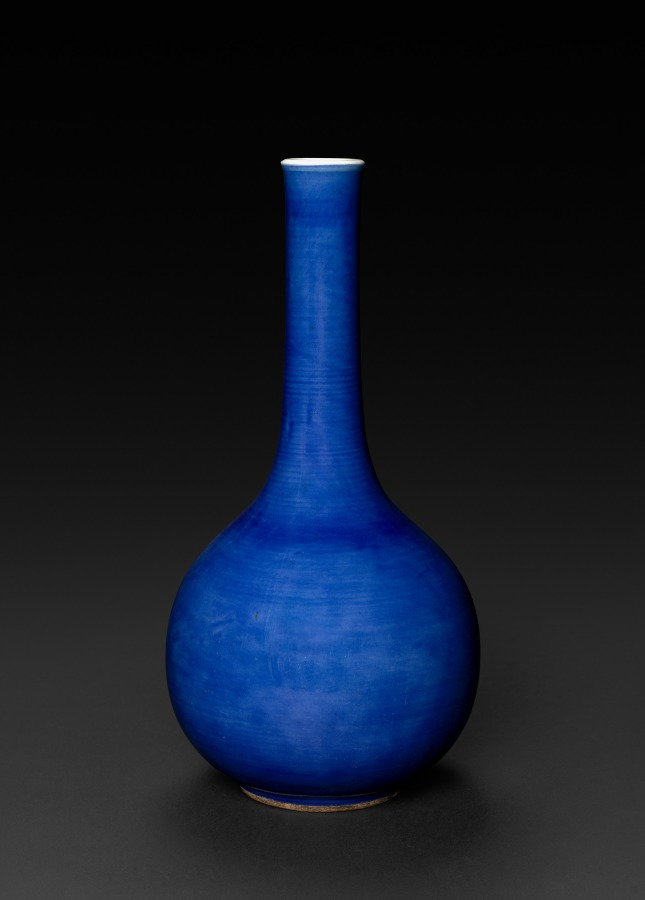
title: Bottle Vase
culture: China, Qing dynasty (1644-1911), Kangxi reign (1662-1722)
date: 1662–1722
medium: porcelain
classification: Ceramic